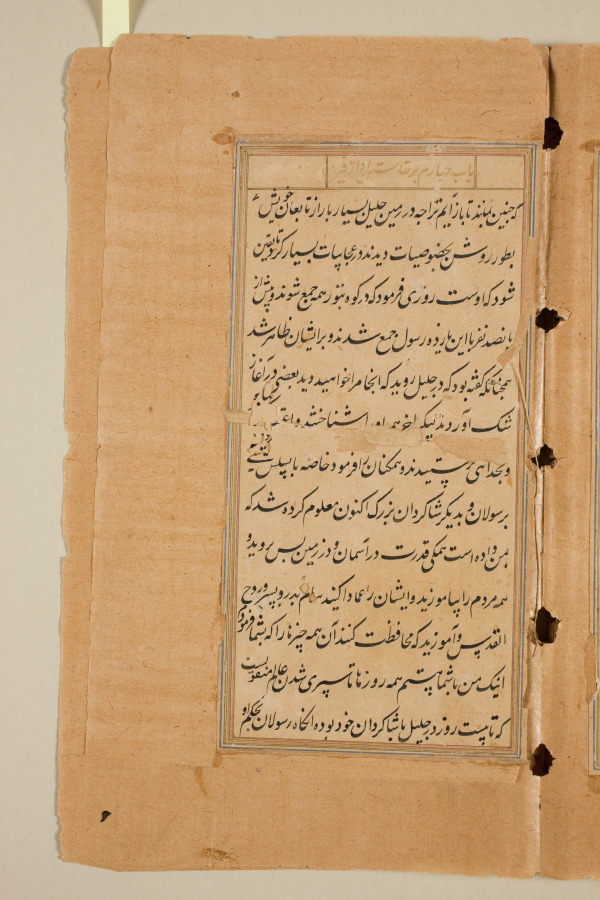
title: Text page from a Mirror of Holiness (Mir’at al-quds) of Father Jerome Xavier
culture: Mughal India, Allahabad, made for Prince Salim (1569–1627)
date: 1602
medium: Ink and gold on paper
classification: Manuscript